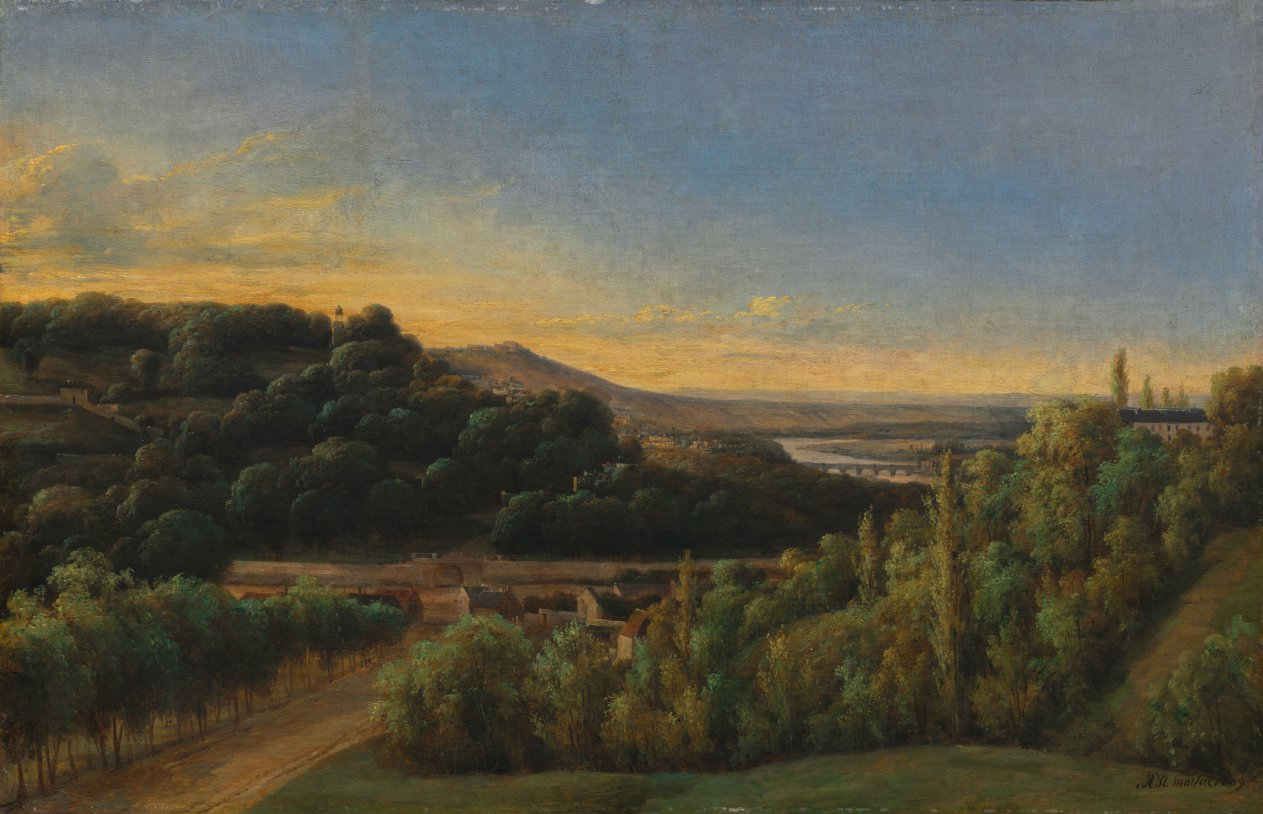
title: View of Saint-Cloud, Near the Seine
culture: France, 19th century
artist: Alexandre Pau de St. Martin (French)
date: 1809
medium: oil on fabric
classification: Painting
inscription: Signed lower right: AP St. Martin 1809 [AP in monogram]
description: This painting depicts the park associated with the royal Chateau of Saint-Cloud, famous for its terraced gardens overlooking the River Seine. At the left of the scene, one of the park's gazebos is set among the trees. This view from Saint-Cloud over the river was a traditional and popular one. Very little is known about the life of Pau de Saint-Martin. Most of his surviving works are landscapes, the titles of which indicate he painted in the Forest of Fontainebleau, southeast of Paris, as early as 1795. Perhaps the artist is most important as the teacher of his nephew Theodore Rousseau (1812–1867), who became the founder of the Barbizon school of landscape painting.